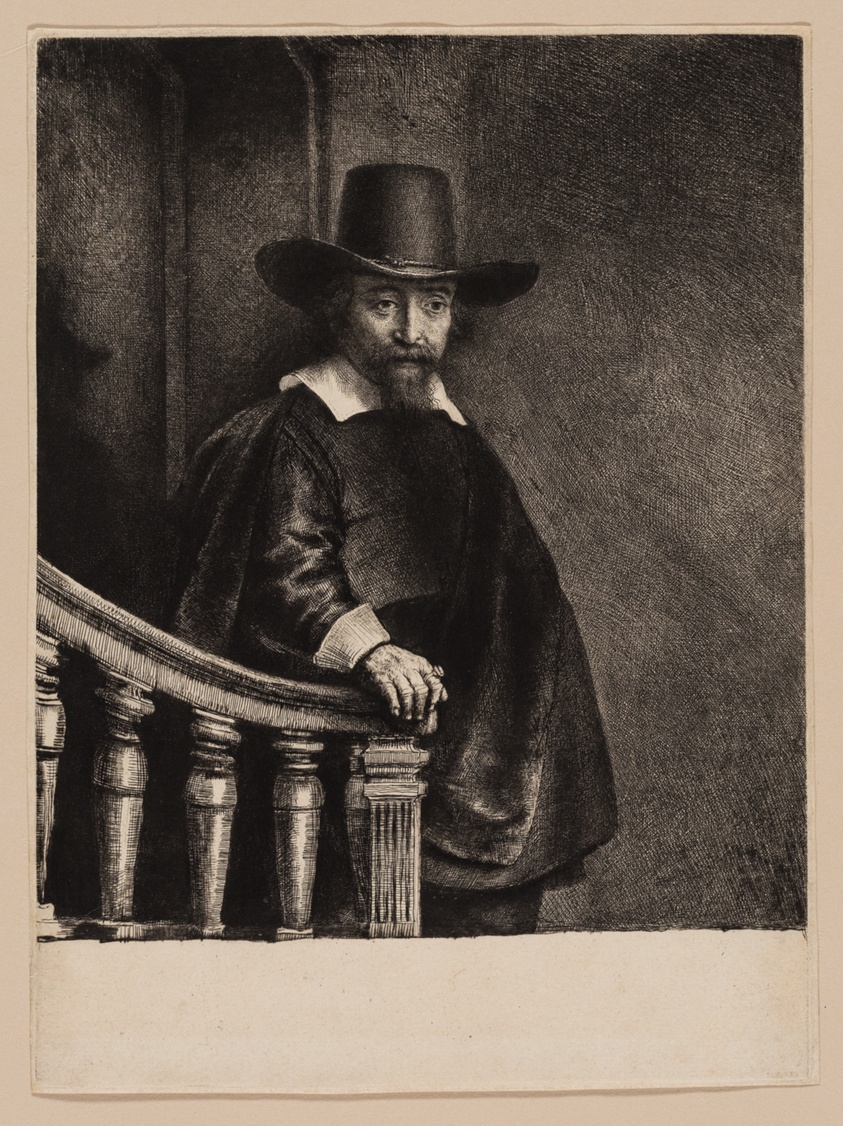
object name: Print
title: Ephraim Bonus, Jewish Physician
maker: Rembrandt van Rijn (Dutch, 1606-1669)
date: 1647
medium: Etching and drypoint in black on ivory laid paper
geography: Holland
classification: etching; print; prints and drawing; paper; drypoint